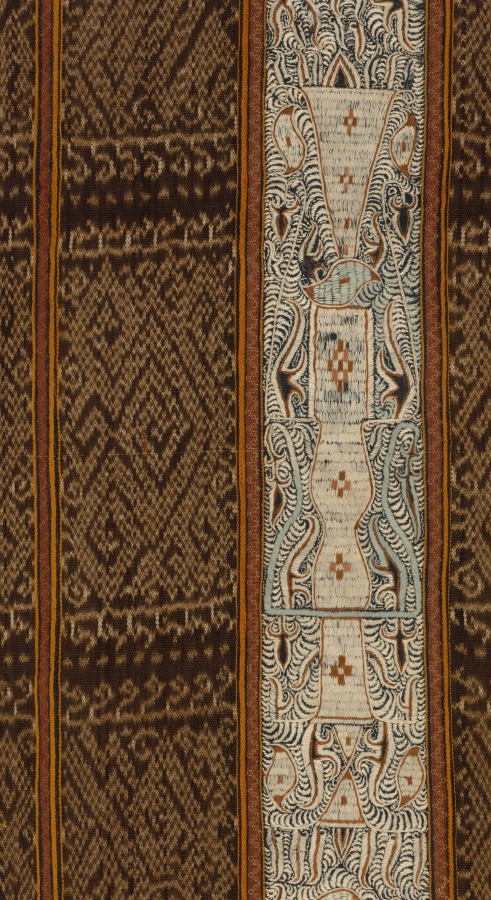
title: Tapis (Garment)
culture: Indonesia, Sumatra, Lampung, 19th century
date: 1800s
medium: tabby weave, warp ikat; cotton / embroidery; silk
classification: Textile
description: "Tapis" from central and southern Sumatra combine warp ikat with embroidery. The angular, geometric designs of the warp ikat can be traced back to the bronze age culture of China. During the first millennium B.C., elements of that culture spread to Indonesia where they survived in remote areas well into the 20th century. Completely different are the mysterious, curvilinear forms of the embroidered bands. Some of these have become too abstracted to identitfy; but others can be recognized as human figures wearing the feathered and horned headdresses of head-hunting rituals. Embroidery designs were presented by a man to his prospective bride, and their motifs were inspired by activities specifically performed by men, such as wood carving, metalwork, and headhunting.